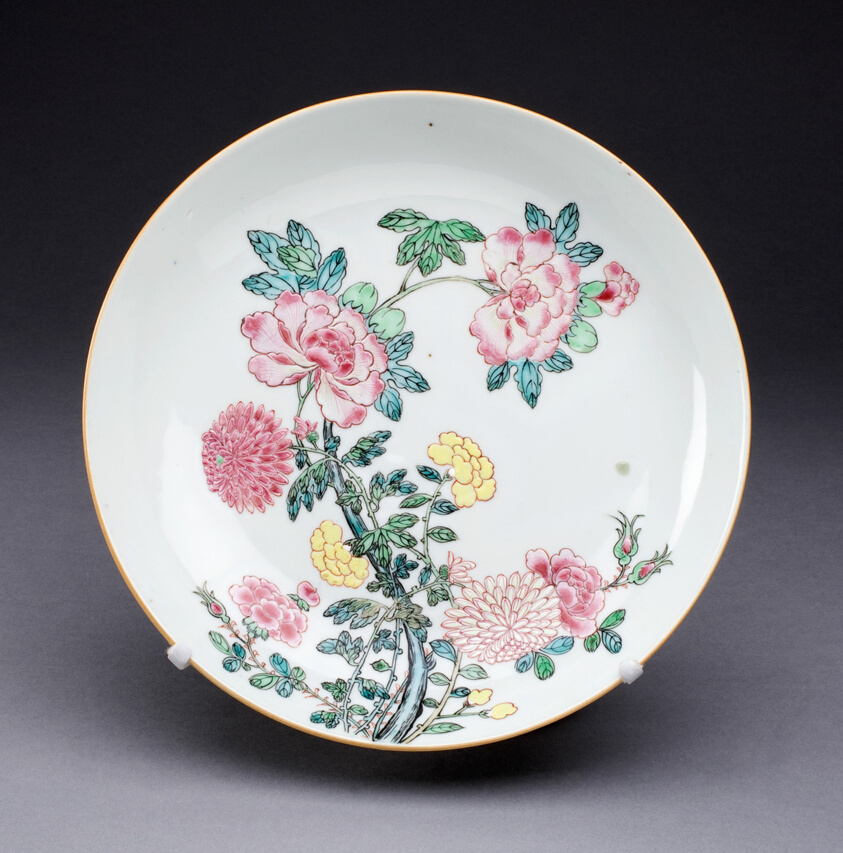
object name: Ceramics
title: Dish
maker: China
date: c. 1725, Qing Dynasty (1644–1911), Yongzhen period (1723–1735)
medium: Hard-paste porcelain and polychrome enamels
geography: China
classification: dish (vessel); ceramics